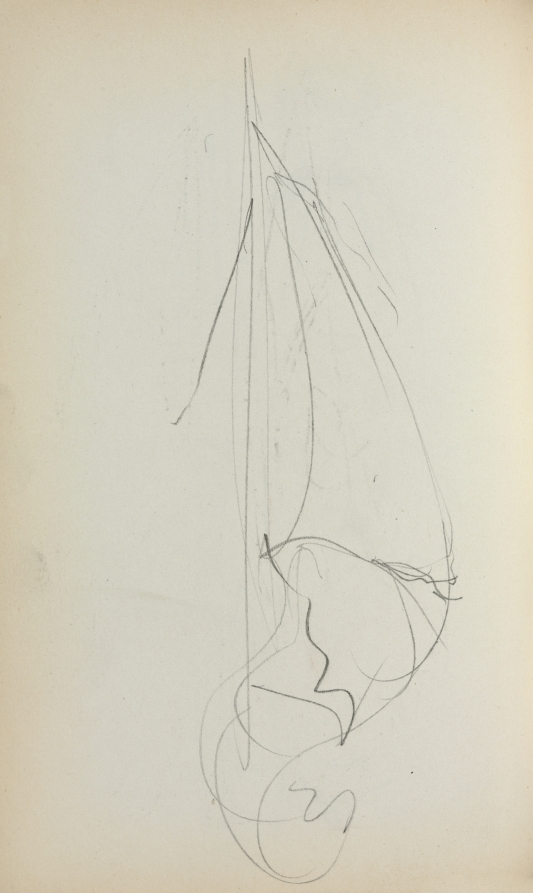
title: Italian Sketchbook: Sail (page 73)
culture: America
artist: Maurice Prendergast (American, born Newfoundland [now Canada], 1858–1924)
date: 1898–1899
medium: pencil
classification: Bound Volume